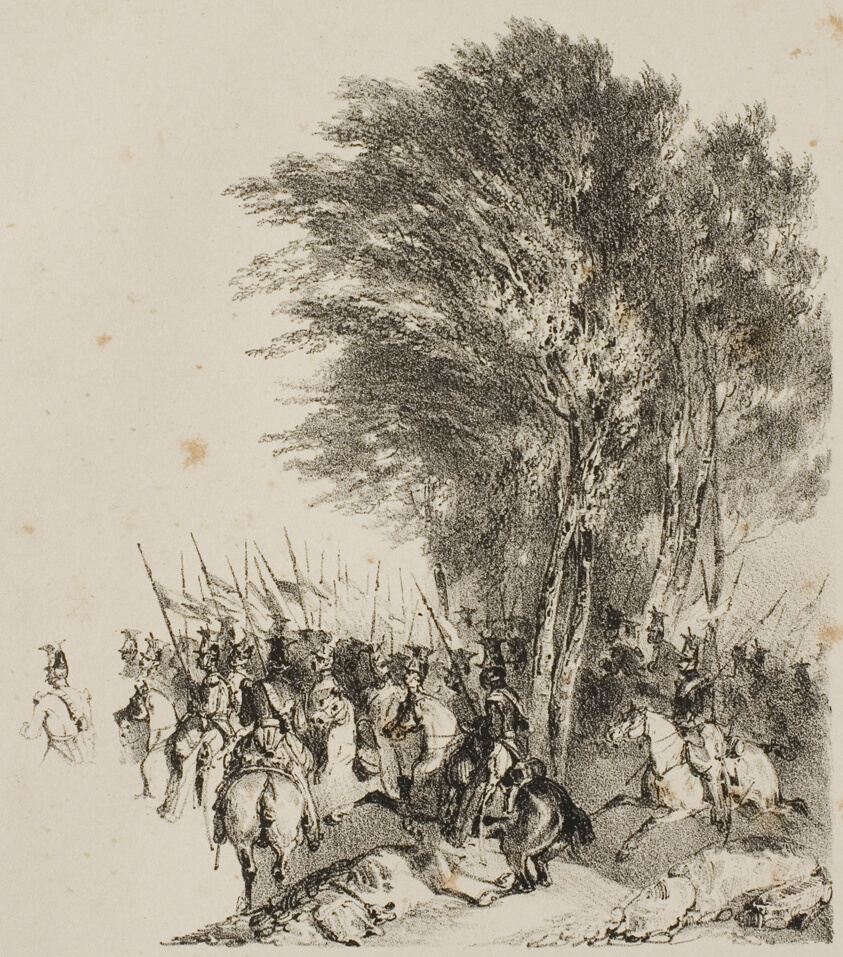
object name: Print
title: Lancers on the March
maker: Nicolas Toussaint Charlet (French, 1792-1845); printed by François le Villain (French, active early 19th century)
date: 1831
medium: Lithograph in black on ivory wove paper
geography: France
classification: lithograph; print; prints and drawing